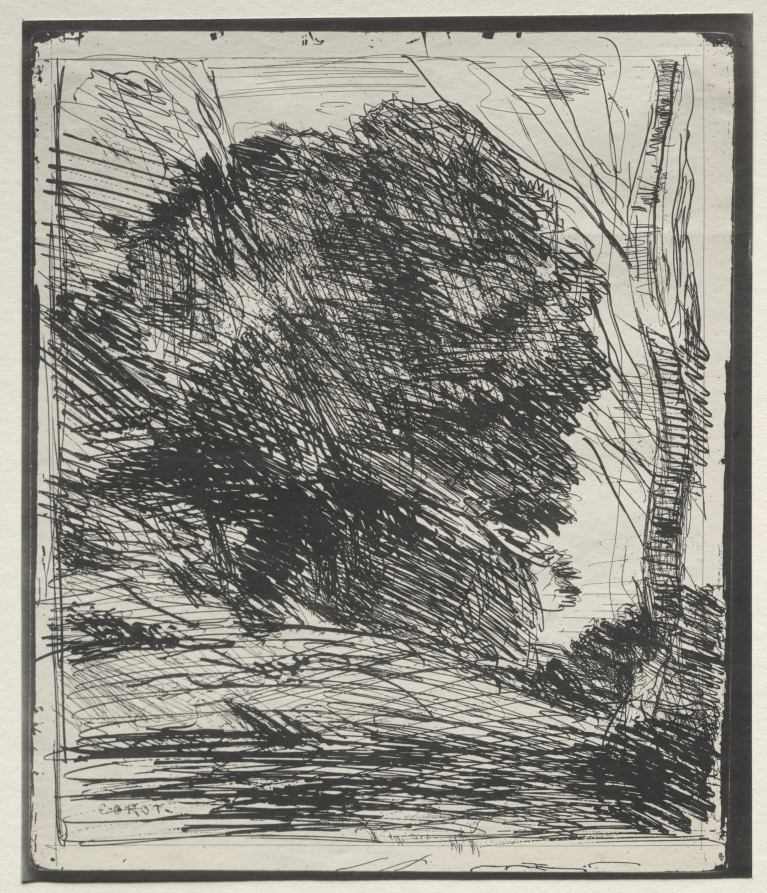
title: Trees on the Mountain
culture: France, 19th century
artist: Jean Baptiste Camille Corot (French, 1796–1875)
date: original impression 1856, printed in 1921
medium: cliché-verre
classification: Print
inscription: signed, lower right: "COROT" in glass plate